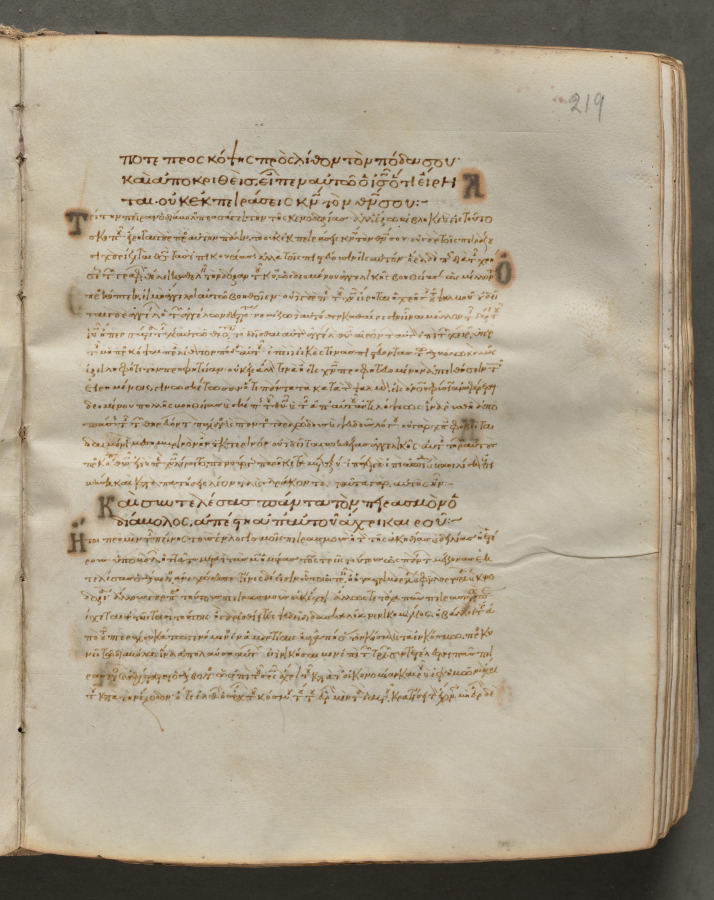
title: Text, folio 219 (recto), from a Gospel Book with Commentaries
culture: Byzantium, Constantinople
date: c. 1000–1100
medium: ink, tempera, and gold on vellum; leather binding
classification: Bound Volume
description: Each of the four gospels in this book opens on a page with brilliantly illuminated borders depicting the author of the text as well as birds-principally peacocks, symbols of the immortality of the soul-and fountains, representing the fountain of life and the salvation of the soul. This volume consists of 428 leaves with texts in Greek. Its level of sophistication suggests that it was probably written and decorated in a monastery in Constantinople.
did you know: Gospel Books were carried in procession through Byzantine churches.